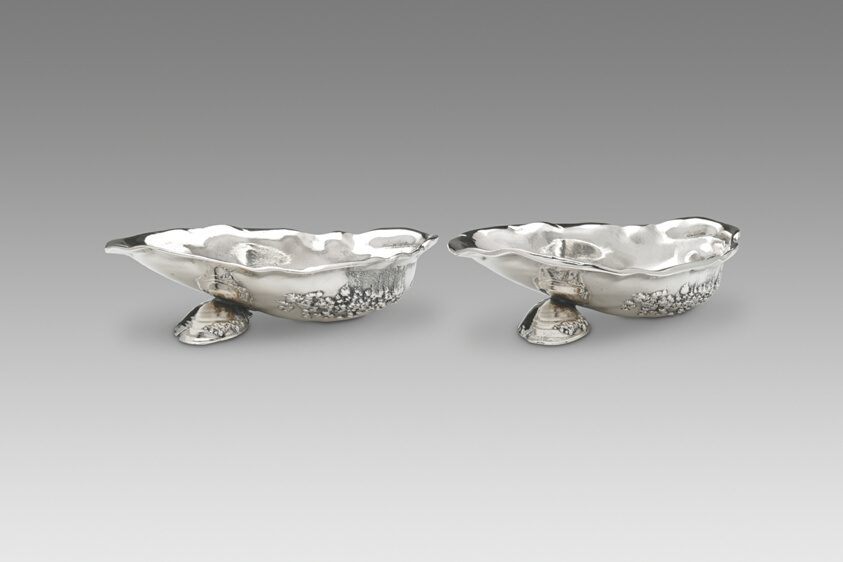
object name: Metalwork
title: Pair of Shell-Shaped Dishes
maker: Gorham Manufacturing Company (American, founded 1831); Providence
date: 1887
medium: Silver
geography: Providence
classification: dish (vessel); silver; american decorative arts; american arts; decorative arts